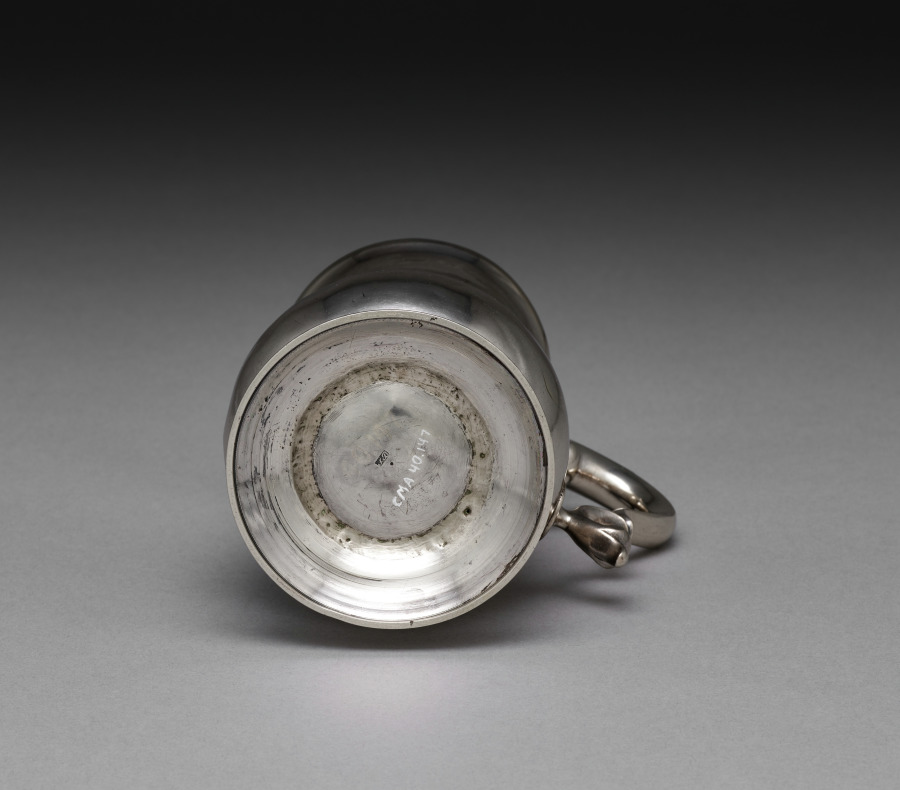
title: Cann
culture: America, Massachusetts, 18th century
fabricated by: Samuel Bartlett (American, 1752–1821)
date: c. 1775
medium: silver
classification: Silver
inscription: engraved "W" over "JH" in block letters on handle beneath thumbpiece.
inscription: Stamped underside: "S.B".